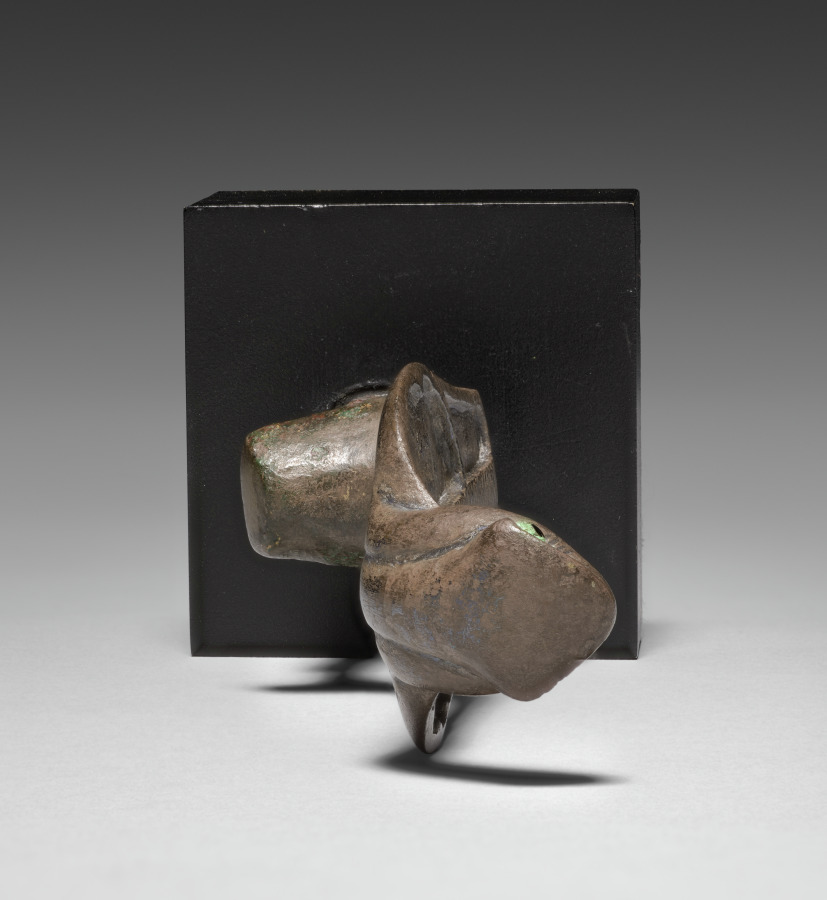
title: Uraeus (Rearing Cobra)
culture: Egypt, New Kingdom (1540–1069 BCE), Dynasty 19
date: 1307–1196 BCE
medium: Silver-copper alloy with inlays (copper, feldspar, turquoise, obsidian?) and gilding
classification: Metalwork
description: Made from a silver-copper alloy, this rearing cobra likely served as a uraeus, symbolizing royal or divine power in ancient Egypt. Its lowermost portion likely fit into the top of the head of a large sculpture, while its body and tail seem cut short, perhaps making room for a solar disk to rise up behind. The eyes are inlaid, and six cavities for additional inlay remain on the expanded hood, the lowermost still intact, the others likely once filled with brightly colored blue and red stone. Much of the remaining surface may once have been gilded, to judge from remaining traces of gold on the back.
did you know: The word uraeus comes from an Egyptian term for “rising/rearing up,” describing the cobra’s position.